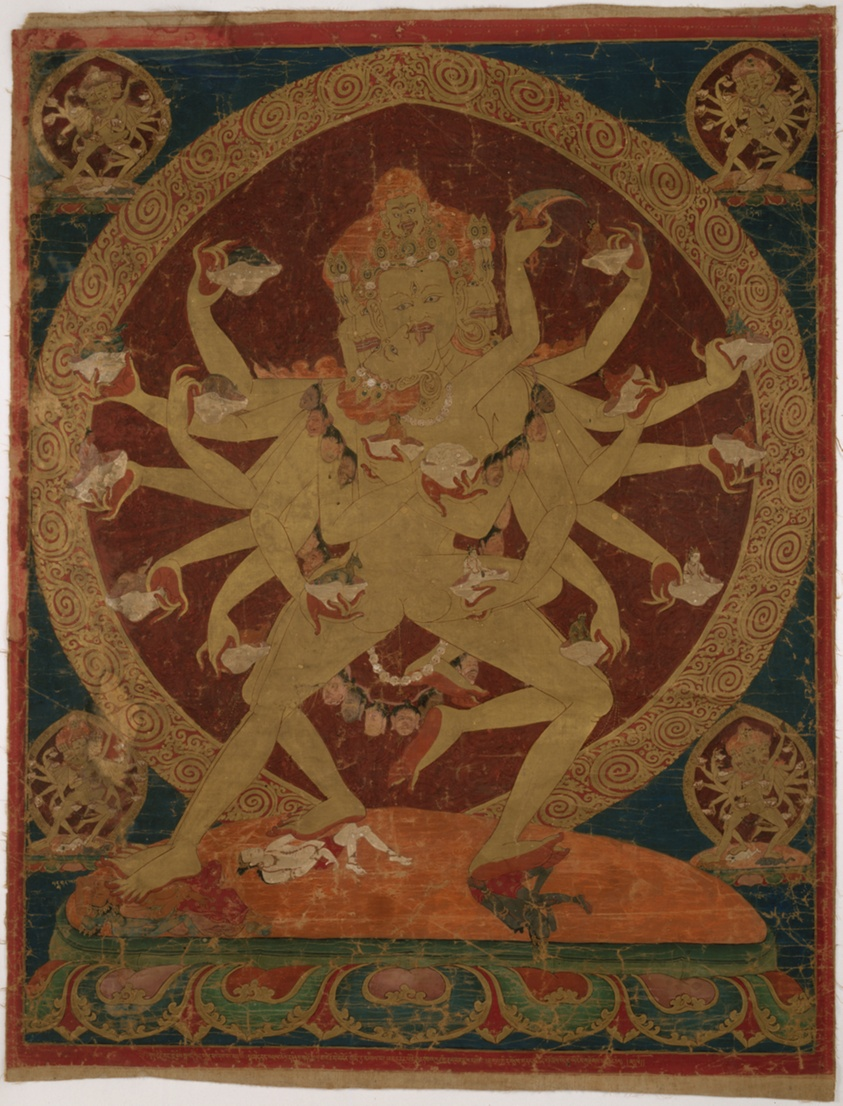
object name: Painting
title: Painted Banner (Thangka) of Skull-Cup Bearing (Kapâladhara) Hevajra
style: Himalayan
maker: Tibet; Central Tibet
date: c. 1604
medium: Pigment on cloth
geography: Tibet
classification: painting; asian art